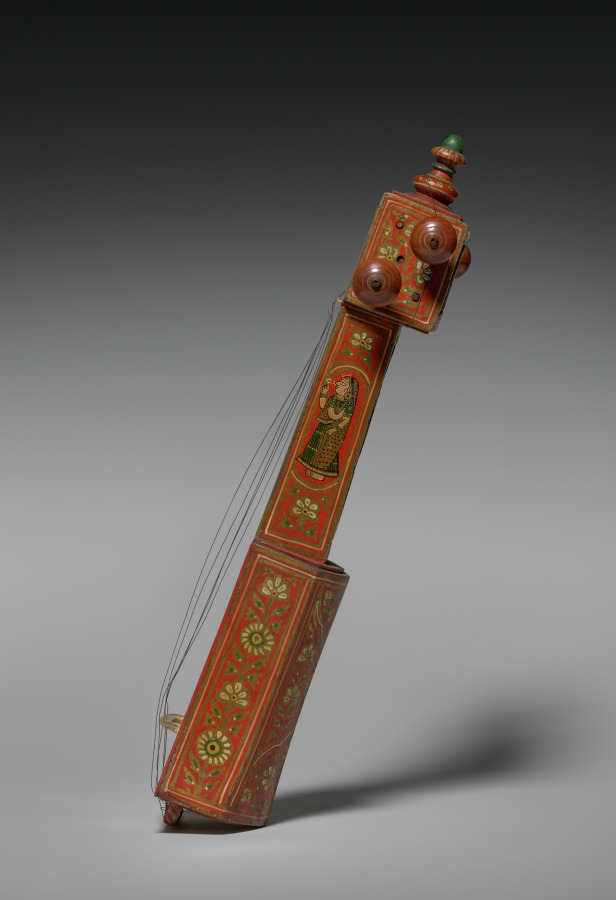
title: Sarangi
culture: India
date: 1800s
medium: Gum tempera and gold on wood with mother-of-pearl and bone or ivory inlays; metal strings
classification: Musical Instrument